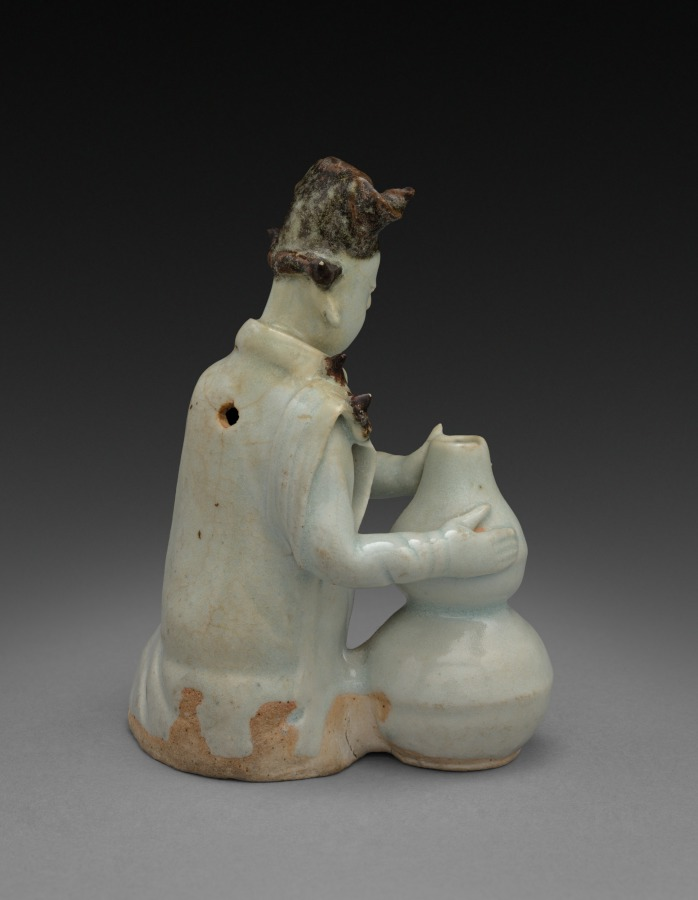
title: Potter Seated with Double Gourd Vase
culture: China, Yuan dynasty (1271-1368) - Ming dynasty (1368-1644)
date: 1300s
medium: Porcelain with underglaze decoration, qingbai ("blue-white") ware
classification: Ceramic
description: Made in South China, this figurine of a potter holding a double-gourd vase was probably once used as a toy. The coarse white porcelain form is covered with thin light greenish-blue, qingbai, glaze. The potter's cap and the coils on his shoulders are painted with blackish-brown ferruginous slip. The glaze stops short of the slightly recessed base, which is burnt a very light pinkish-buff color.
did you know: The double gourd is traditionally regarded as a talisman that protected children against diseases.